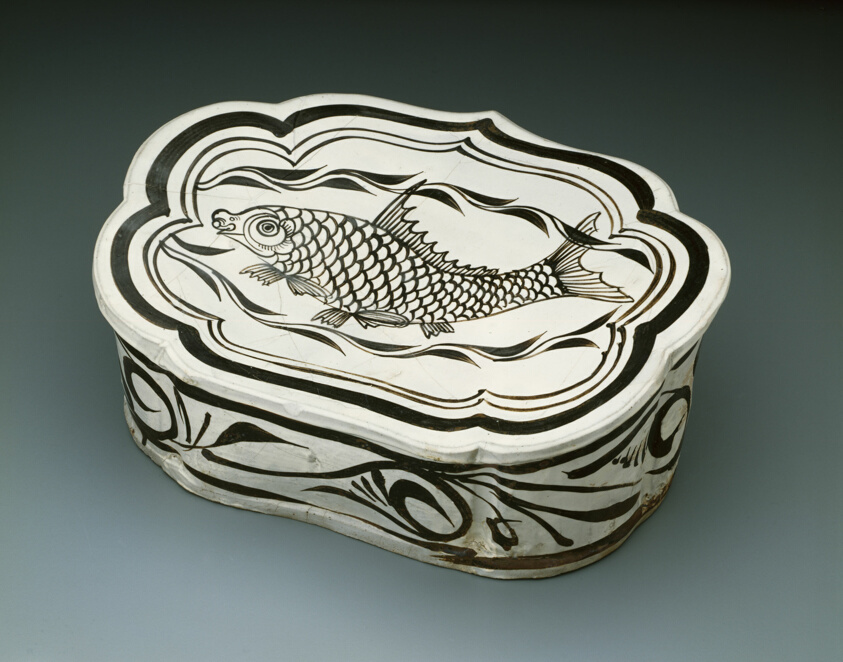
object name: Decorative Arts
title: Cloud-Shaped Pillow with Fish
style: Chinese (culture or style)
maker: China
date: Jin dynasty (1115–1234), 12th/13th century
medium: Cizhou ware; stoneware, slip-coated, with underglaze painting in iron brown slip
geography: China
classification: stoneware; asian art; ceramics; decorative arts